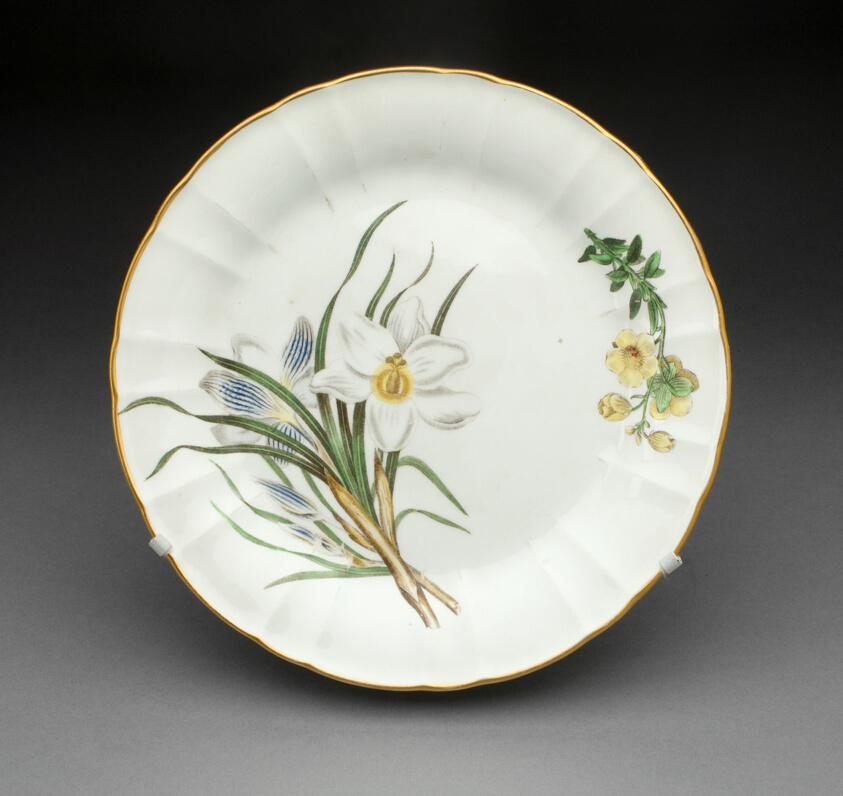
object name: Ceramics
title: Plate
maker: Wedgwood Manufactory (England, founded 1759)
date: c. 1820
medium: Porcelain with transfer-printed polychrome enamels and gilding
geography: Burslem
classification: plate (general, dish); tableware; dish (vessel); porcelain; european decorative arts; ceramics